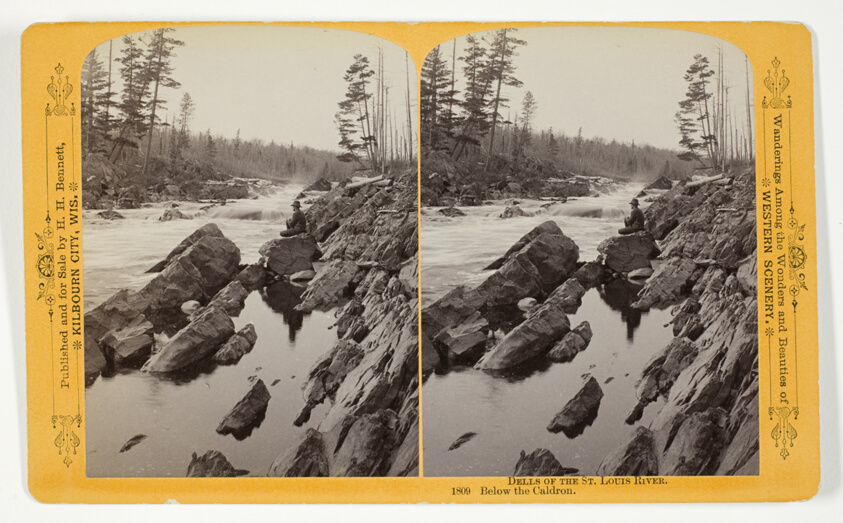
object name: Photograph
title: Below the Caldron, No. 1809 from the series "Dells of the St. Louis River"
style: 19th century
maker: Henry Hamilton Bennett (American, born Canada, 1843–1908)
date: 1889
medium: Albumen print, stereo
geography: United States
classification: stereograph (albumen); albumen silver print; photographic process; photography; photograph